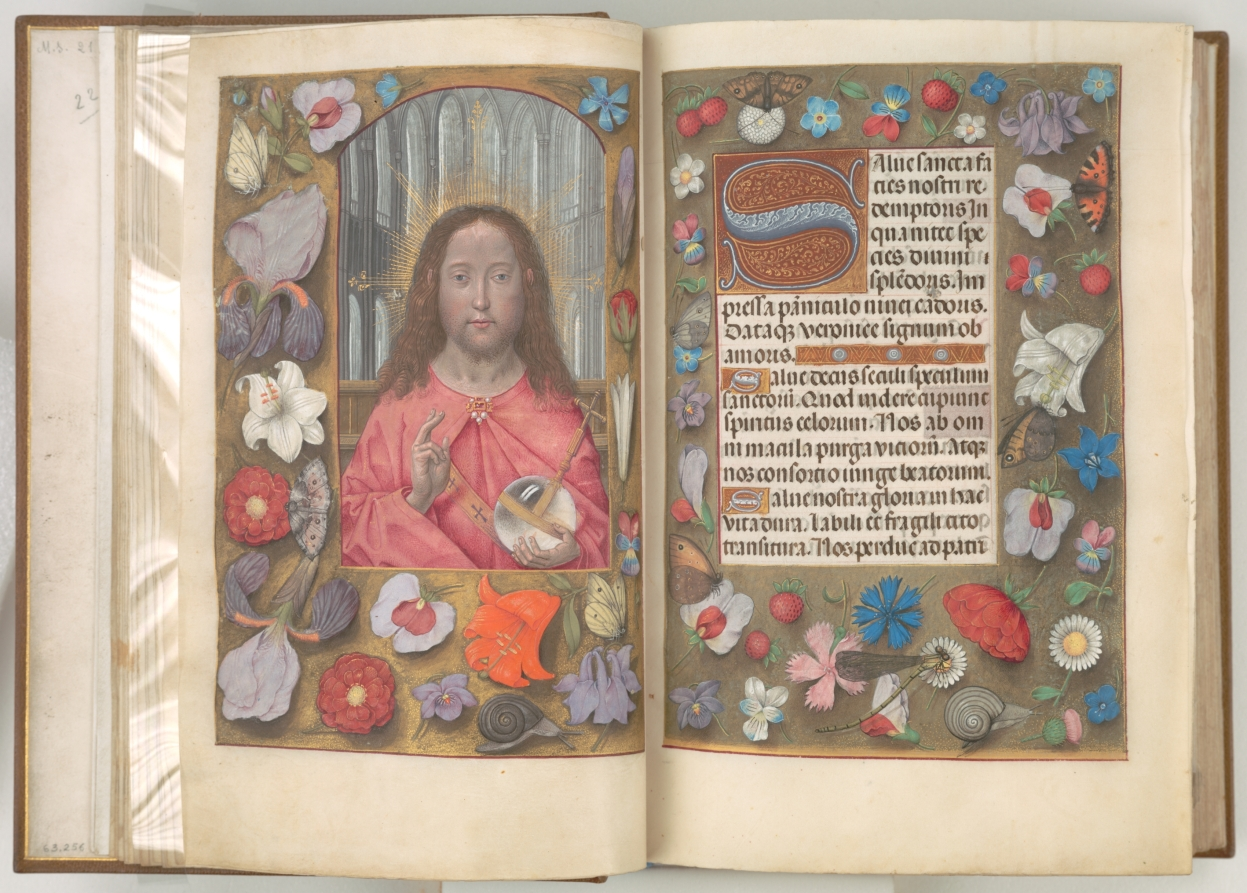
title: Hours of Queen Isabella the Catholic, Queen of Spain: Fol. 15r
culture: Flanders, Ghent and Bruges, late 15th century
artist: Master of the First Prayerbook of Maximillian (Flemish, c. 1444–1519)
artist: and Associates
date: c. 1500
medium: ink, tempera, and gold on vellum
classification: Bound Volume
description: This manuscript was illuminated by a circle of at least five highly organized manuscript painters active in the Flemish cities of Ghent and Bruges. The principal illuminator was Alexander Bening, who painted the majority of the book's miniatures. Manuscripts produced by this circle of artists are renowned for the decoration of their borders, which typically feature a rich variety of realistically-painted flowers, birds, and butterflies. This prayer book, called a book of hours, was intended not for a cleric, but for the private devotions of a lay person-in this case, Isabella the Catholic, Queen of Spain (1451-1504). Isabella's coat of arms embellishes the book's frontispiece. It is unlikely that the book was commissioned by the Queen herself; rather, she probably received it as a diplomatic gift from someone courting her patronage, perhaps Cardinal Francisco Jimenez de Cisneros. A Franciscan friar, Jimenez was dependent upon Isabella for his advancement, first to the post of Queen's confessor in 1492, and then to Archbishop of Toledo in 1495.